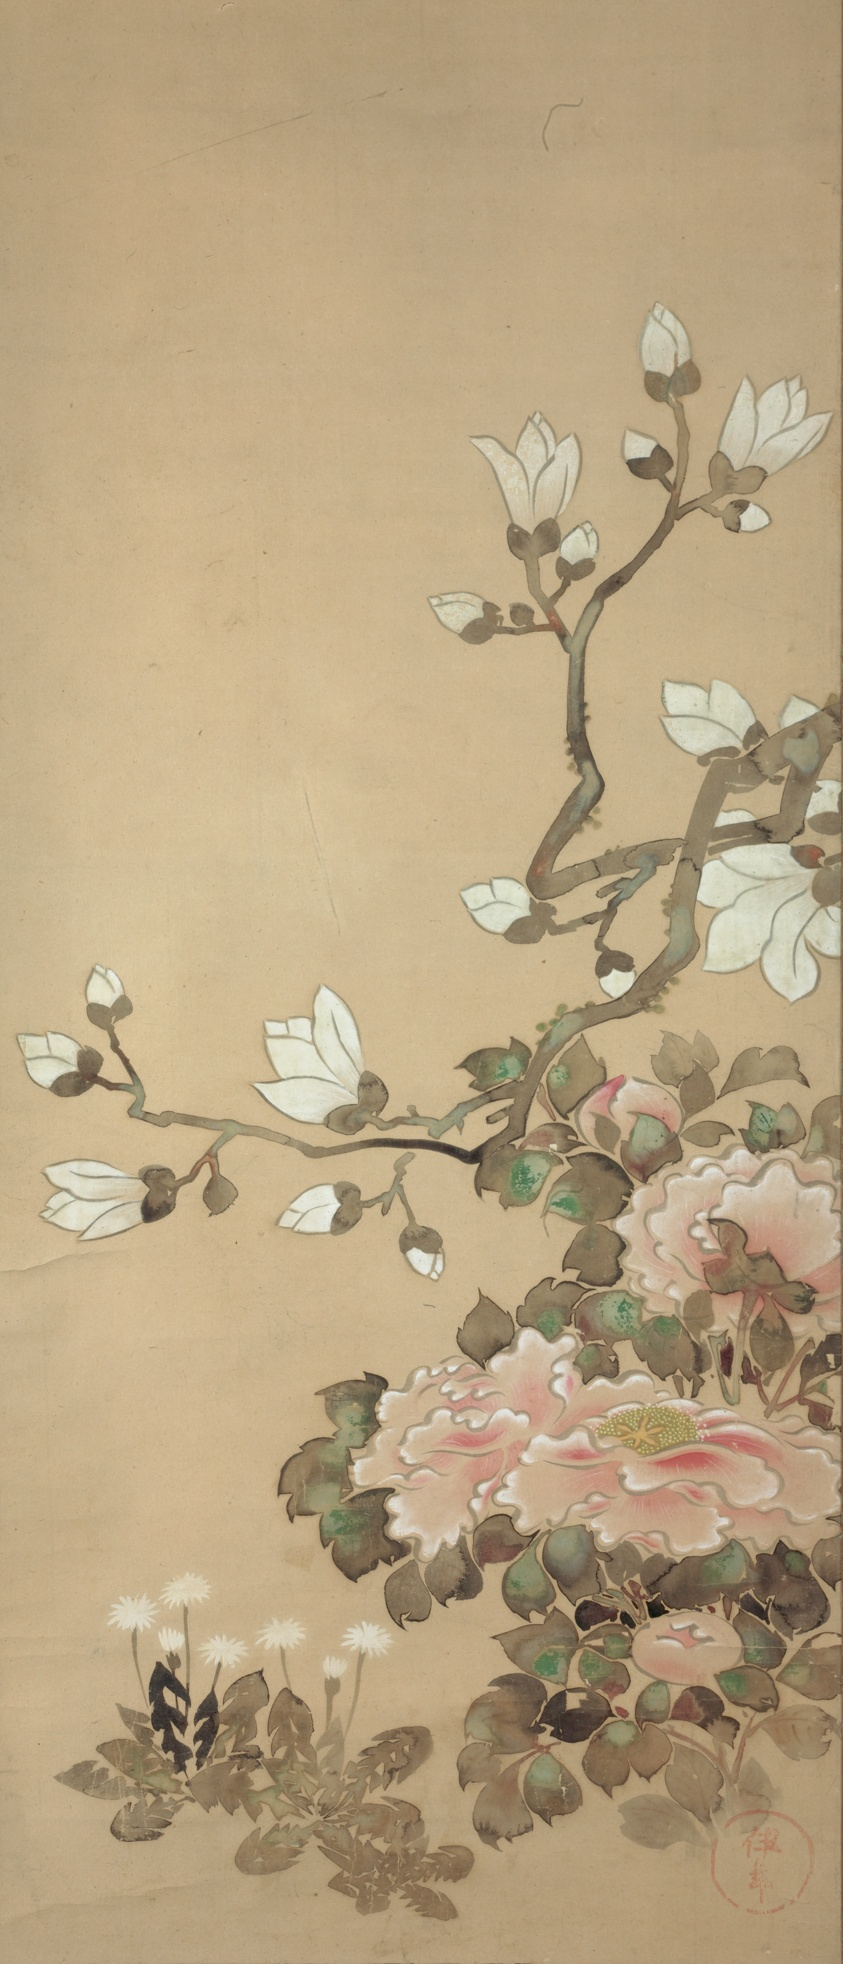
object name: Painting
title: Peonies, Magnolia, and Dandelions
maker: School of Tawaraya Sôtatsu; Japanese, active 18th century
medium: Hanging scroll; ink and colors on paper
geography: Japan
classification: hanging scroll; painting; asian art